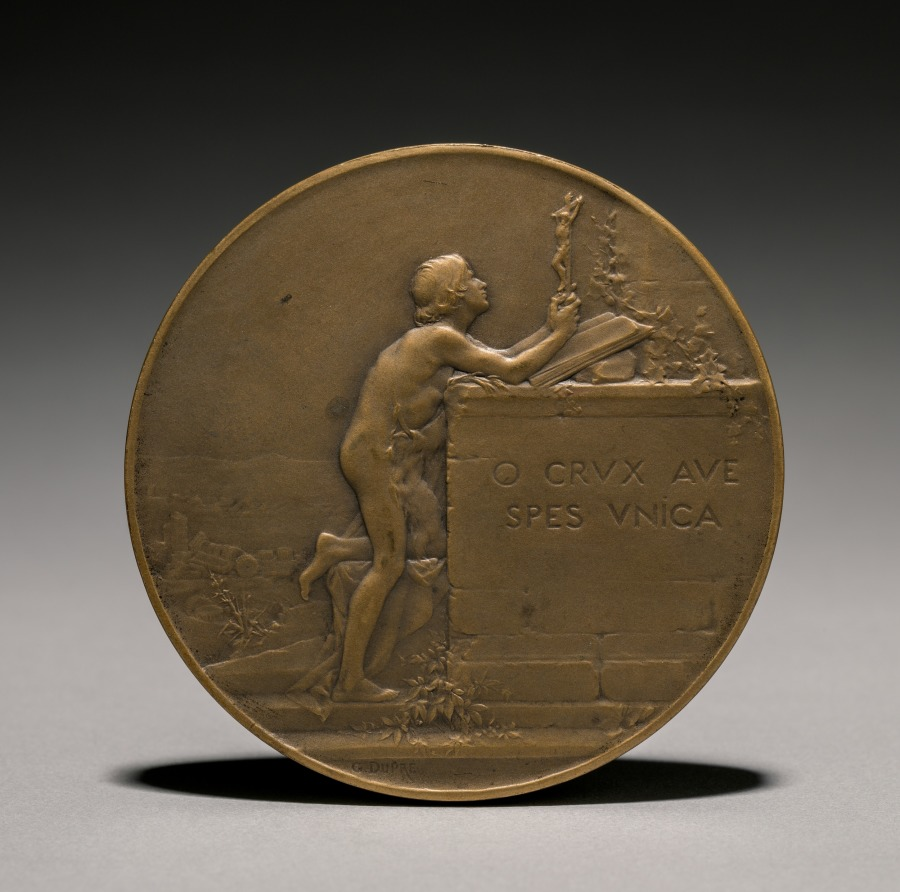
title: Medal (reverse)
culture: France, 19th century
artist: Jules Dupré (French, 1811–1889)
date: 1800s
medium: bronze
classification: Metalwork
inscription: "O Crux ave spes unica."